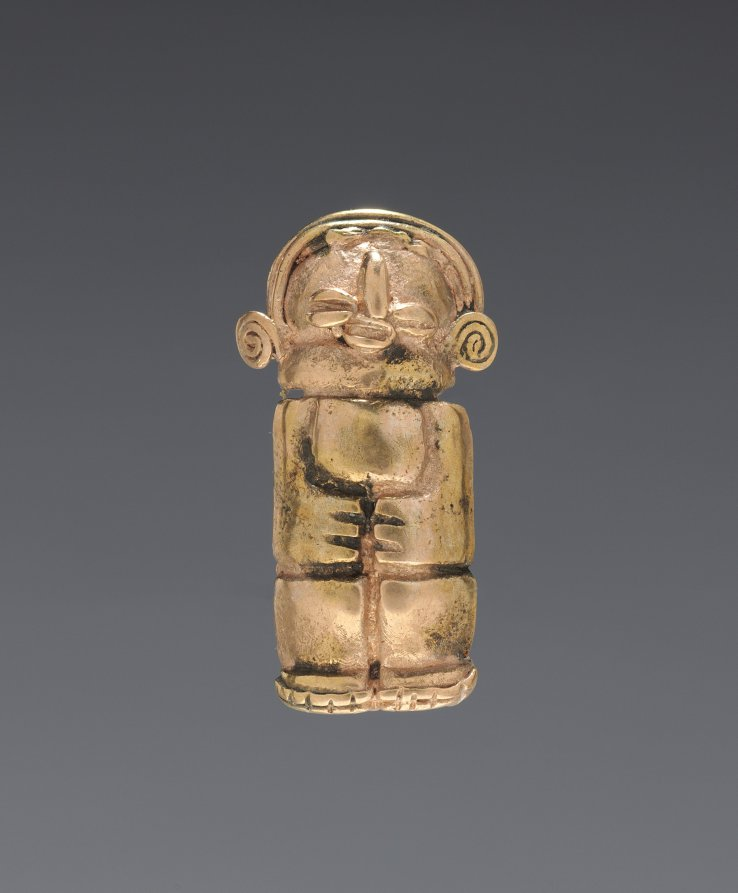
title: Necklace Figurine Bead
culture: Colombia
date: 1–700 CE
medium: cast gold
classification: Jewelry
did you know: Working with gold dates back to at least 500 BC in Ecuador and Colombia.